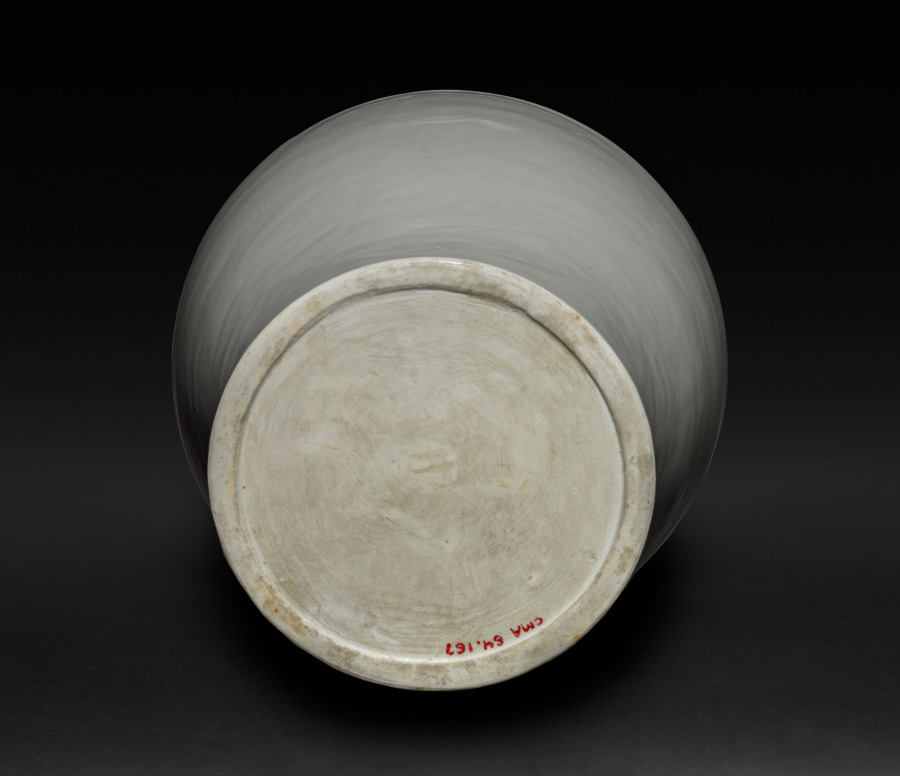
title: Meiping Vase with Cloud Collars and Peony Sprays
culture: China, Jiangxi province, Jingdezhen kilns, Ming dynasty (1368-1644), Yongle period (1403-1424)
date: 1403–24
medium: porcelain with incised decoration and white glaze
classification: Ceramic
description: This beautiful vase, called a meiping, is a testimony to the extremely high standards demanded for imperial white porcelain of the Yongle period. It is exquisitely potted and subtly decorated with "hidden decoration" (anhua) incised into the body. The clear glaze over the white body has a luster and purity; the white color radiates with a soft glow like melting snow, described by the Chinese connoisseurs as tianbai, or "sweetwhite." Tianbai wares were produced for use in imperial offerings and have always been considered a great achievement of the Yongle period.